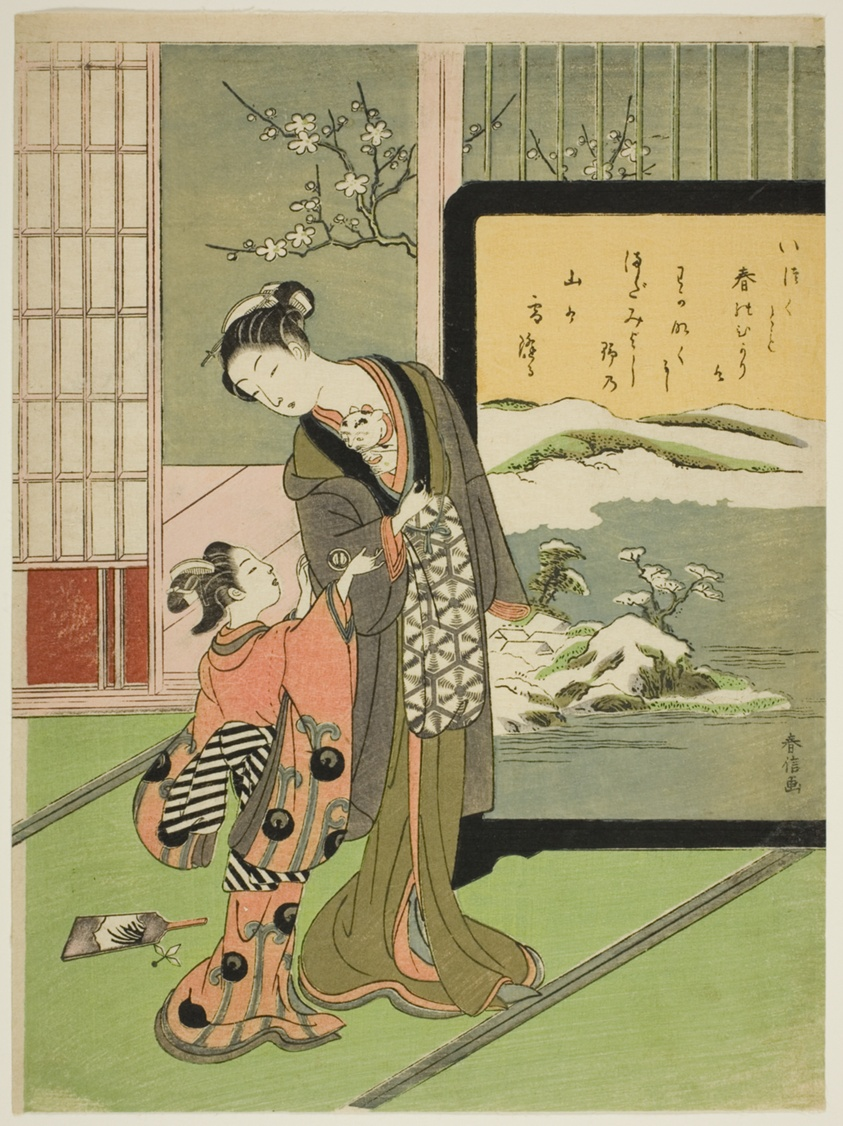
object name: Print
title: Courtesan and Her Child Attendant Playing with a Cat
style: Japanese (culture or style)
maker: Suzuki Harunobu 鈴木 春信; Japanese, 1725 (?)-1770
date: c. 1768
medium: Color woodblock print; chuban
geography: Japan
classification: woodblock print; print; asian art